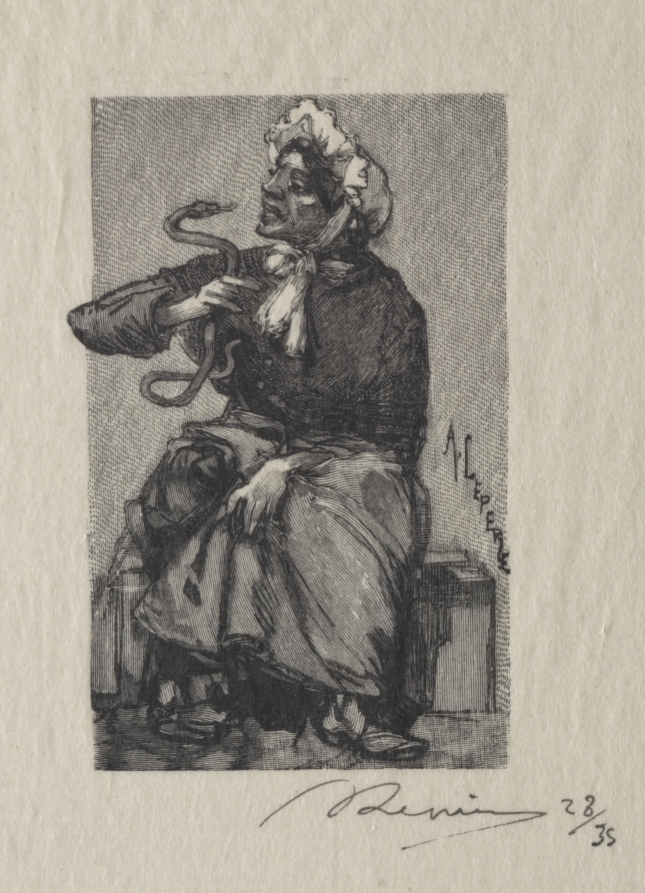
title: Marchande de Serpents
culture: France, 19th century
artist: Auguste Louis Lepère (French, 1849–1918)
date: 1889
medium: wood engraving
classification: Print